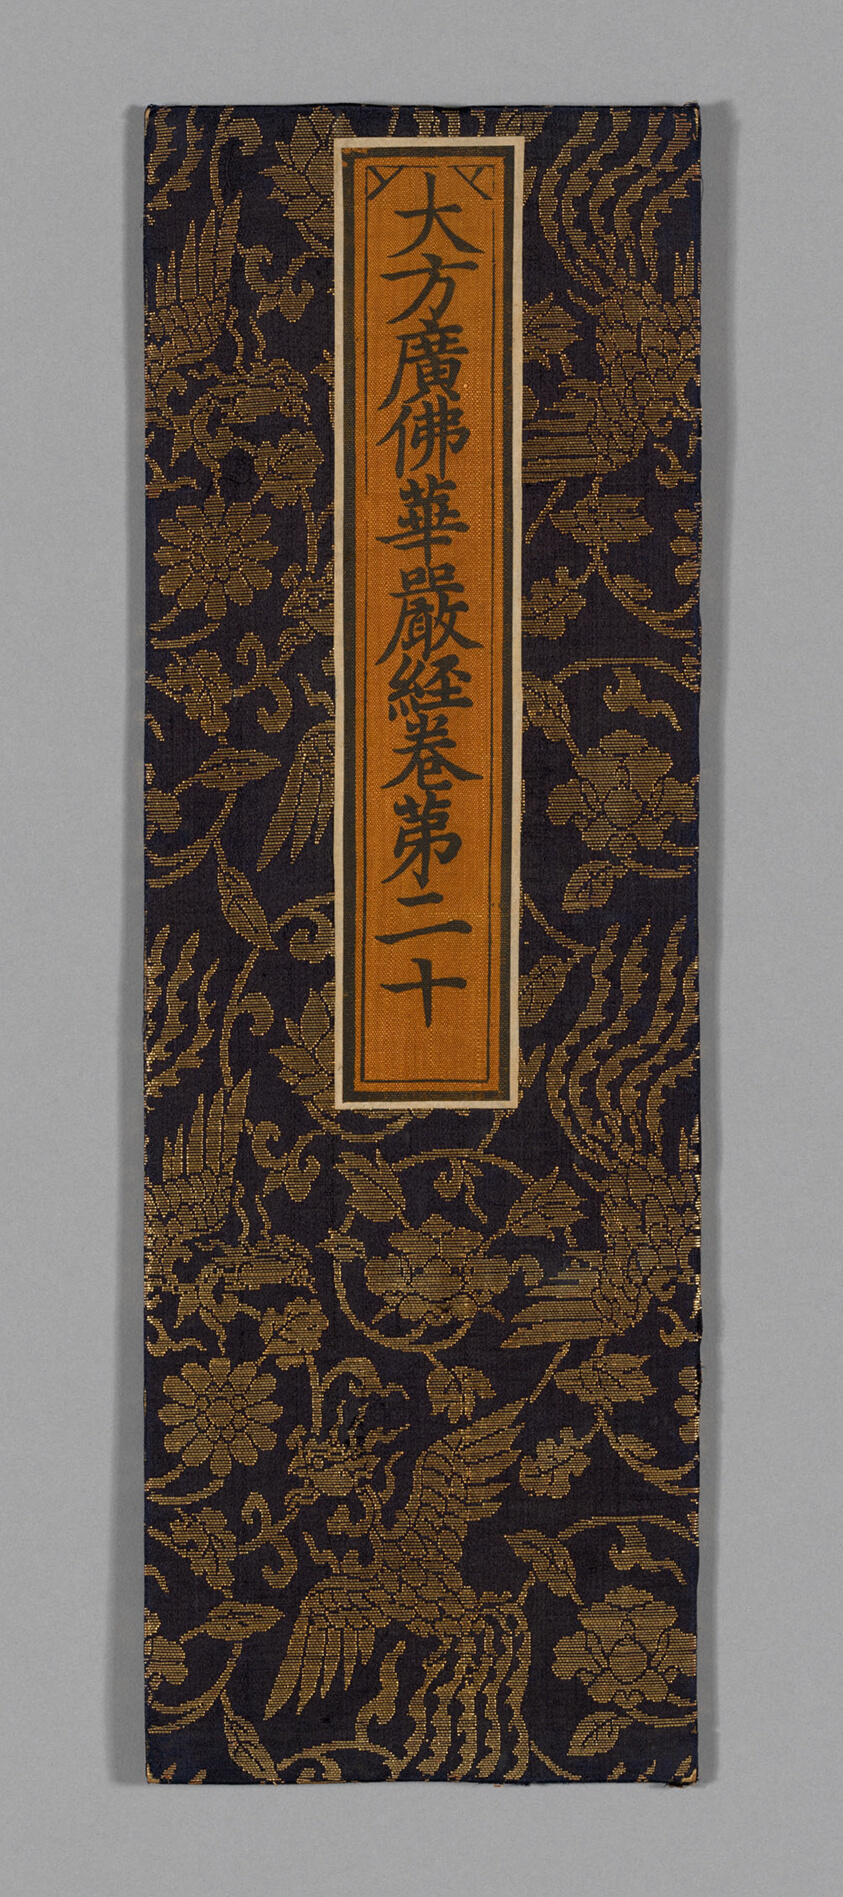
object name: Textile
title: Sutra Cover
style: ming, Chinese (culture or style), East Asian, asian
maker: China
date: Ming dynasty (1368–1644), c. 1590's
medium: Silk and gold-leaf-over-lacquered-paper strips, warp-float faced 4:1 satin weave with supplementary patterning wefts bound in weft-float faced 1:4 satin interlacings; label: silk, plain weave; painted with ink; glued to paper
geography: China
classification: textile; weaving